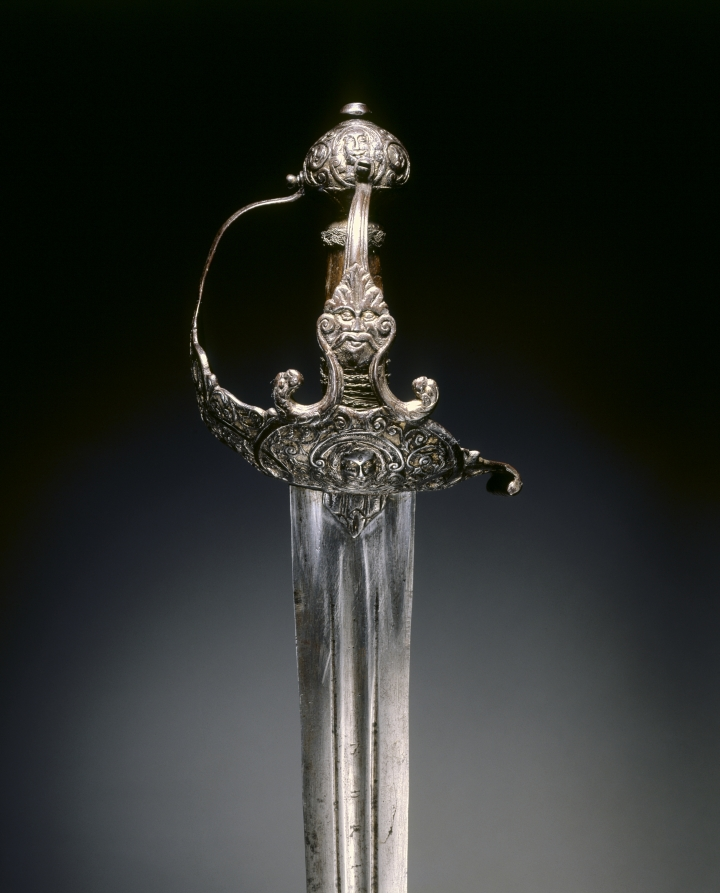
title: Basket-Hilt Broadsword ("Mortuary Sword")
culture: Hilt: England; Blade: Germany, Solingen (?), Hilt: 17th Century; Blade: 18th Century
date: hilt: c. 1640–50; blade: 1700s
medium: steel, chiseled; inlaid gilt- silver foil; wood and wire grip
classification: Arms and Armor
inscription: ANDRIA FERRARA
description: The decoration on this sword's hilt includes an image of King Charles I of England (beheaded in 1649). Because the image resembles the king's death mask, this sword is known as a "mortuary sword." It may have belonged to Sir Thomas Fairfax, a general of the Parliamentary cavalry during the English Civil War (1642-51). Large, double-edged broadswords, designed for heavy cavalry use, were common from the 1600s through the 1800s.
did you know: The ornate basket hilt which protects the hand, is chiseled with leafy decorative scrollwork and grotesque masks.